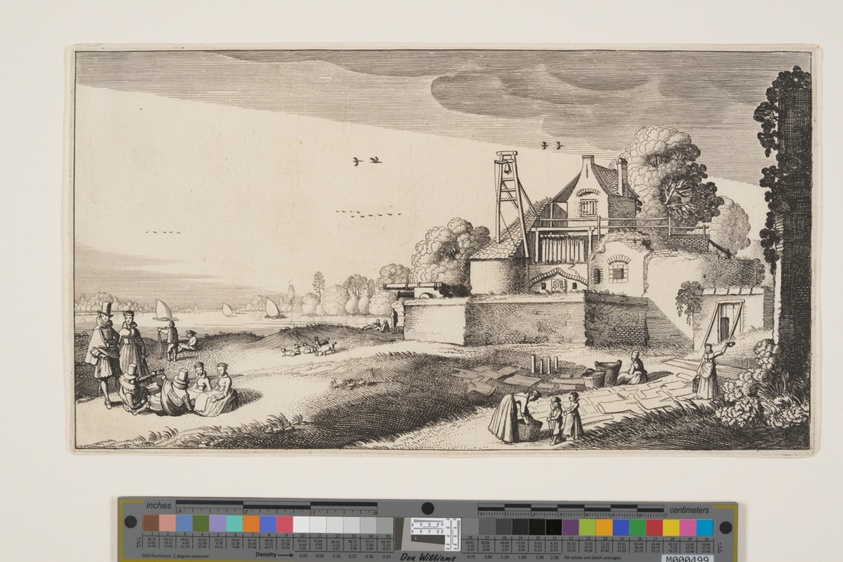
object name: Print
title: Bleaching-Field in Front of a Fort on a River, from Landscapes (Playsante Lantschappen)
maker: Attributed to Claes Jansz. Visscher II (Dutch, 1586-1652); after Jan van de Velde II (Dutch, c. 1593-1641)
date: c. 1641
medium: Etching, with engraving, on ivory laid paper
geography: Netherlands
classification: etching; paper; print; prints and drawing